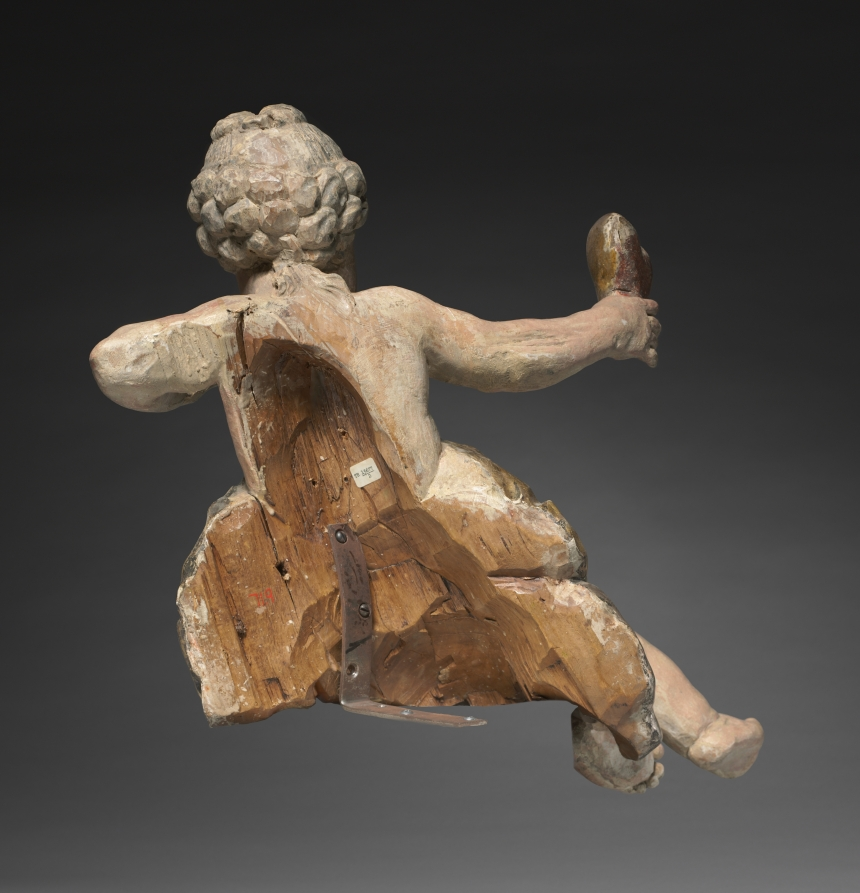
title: Putto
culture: Germany, near Bamberg, 18th century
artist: Ferdinand Tietz (Austrian, 1708–1777)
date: mid-1700s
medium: painted and gilded wood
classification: Sculpture